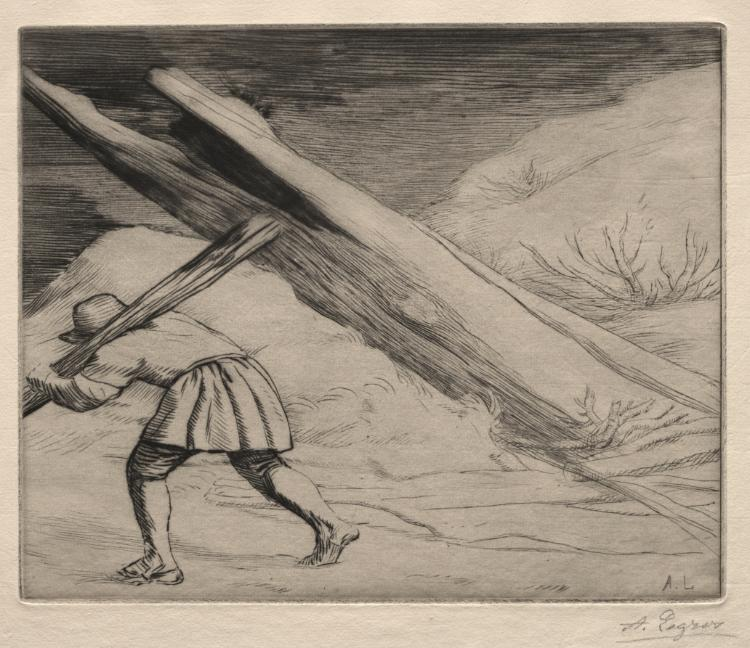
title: Winter (1st Plate)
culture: France, 19th century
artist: Alphonse Legros (French, 1837–1911)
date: c. 1857–1911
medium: drypoint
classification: Print